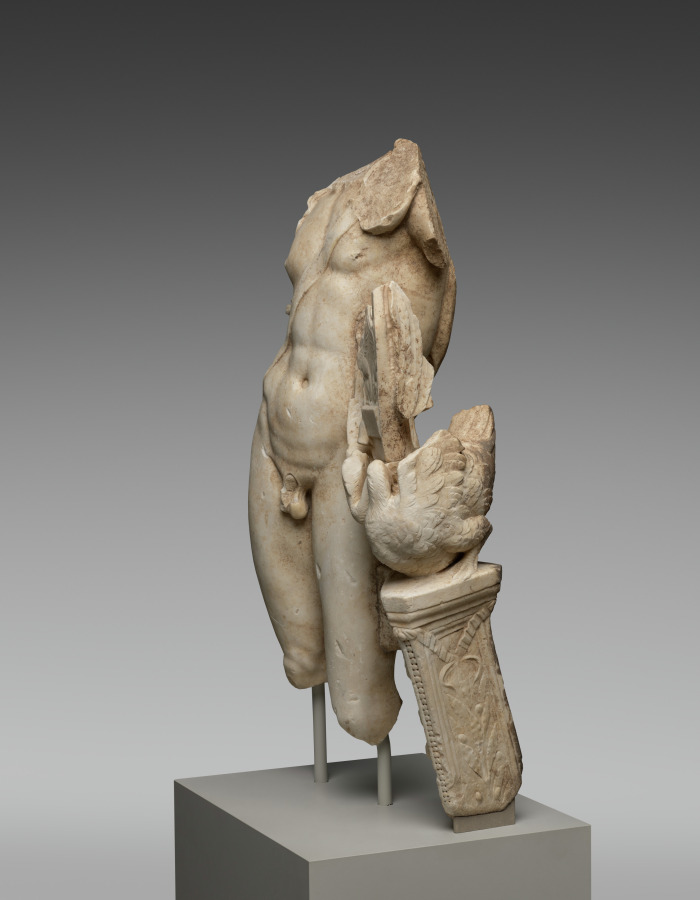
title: Torso of Apollo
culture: Italy, Roman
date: c. 100–200 CE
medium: marble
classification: Sculpture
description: This ancient statue depicts the Greek god Apollo, identified by his youthful body and the fragmentary remains of his kithara, a type of lyre (or stringed instrument) used by poets and musicians in ancient Greece. Both the kithara, decorated with griffins, and the swan upon which it rests (atop a triangular column), signify Apollo’s roles as the god of music and leader of the Muses. Beloved by the Muses for their song, swans were considered sacred to Apollo because he gave them the gift of prophecy. Swans sing a glorious song before they die, knowing they will soon return to Apollo to be reborn.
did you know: Apollo received his lyre from Hermes, who invented it.